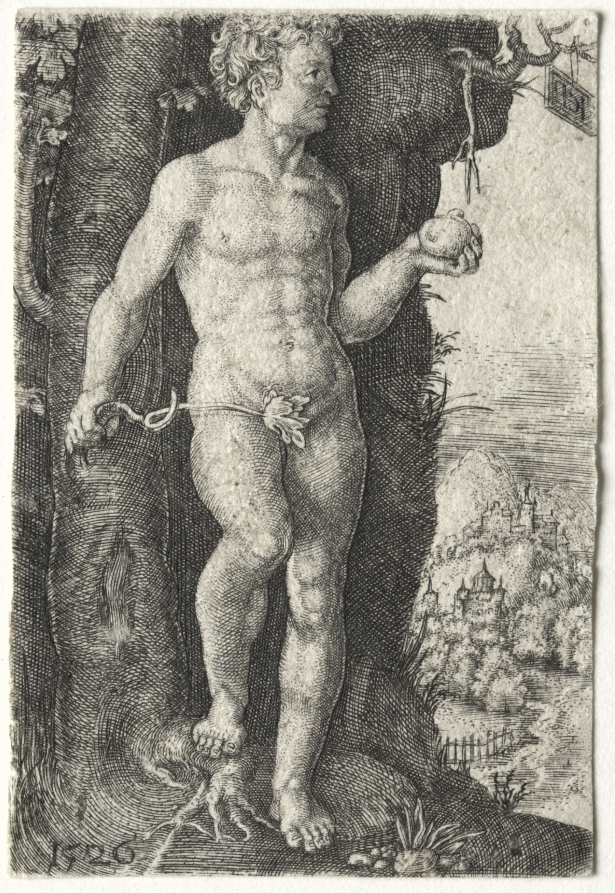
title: Adam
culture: Germany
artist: Jacob Binck (German, 1500–1569)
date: 1526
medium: engraving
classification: Print